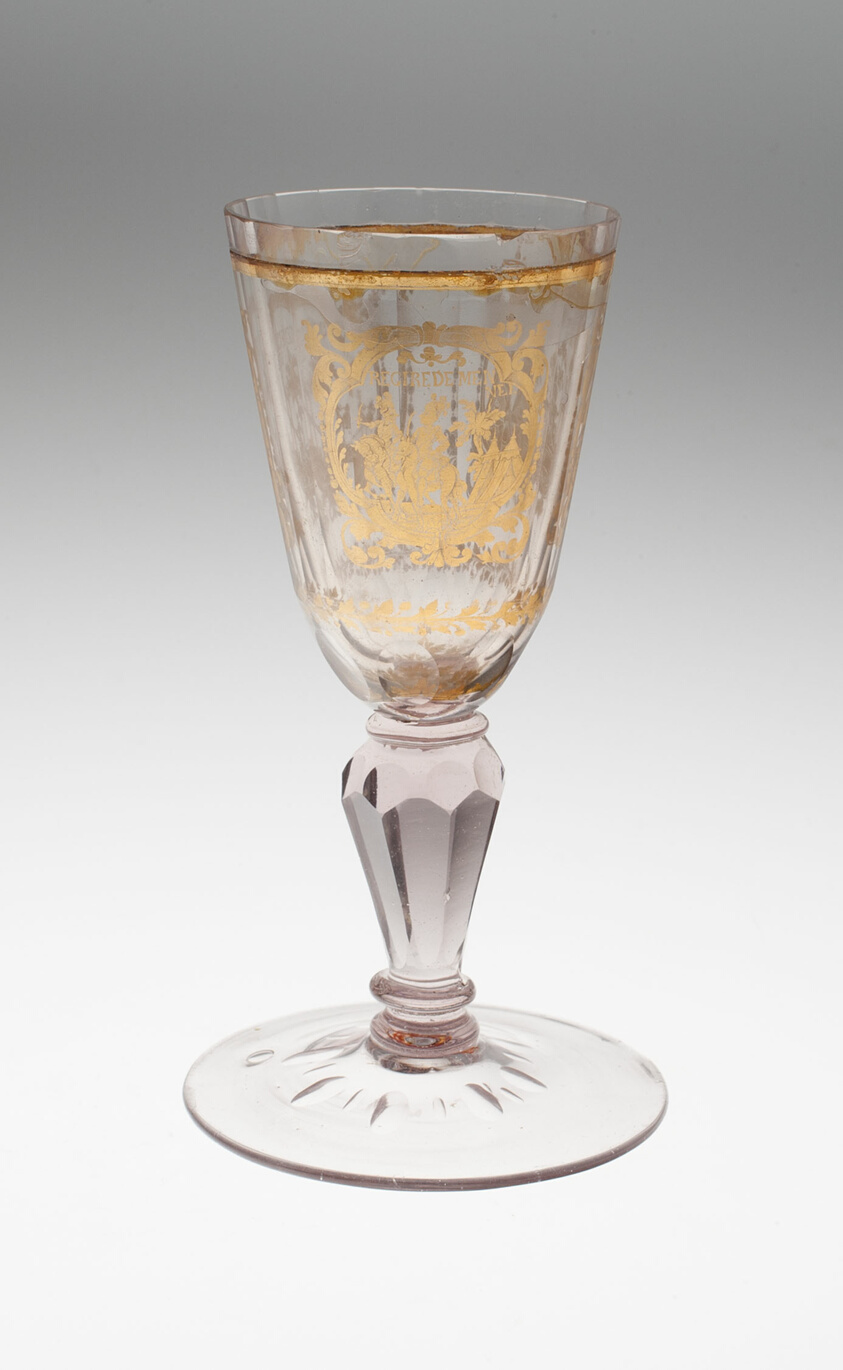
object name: Glass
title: Wine Glass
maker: Bohemia, Czech Republic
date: c. 1800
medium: Glass with engraved gold leaf decoration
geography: Bohemia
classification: drinking vessel; glass; european decorative arts